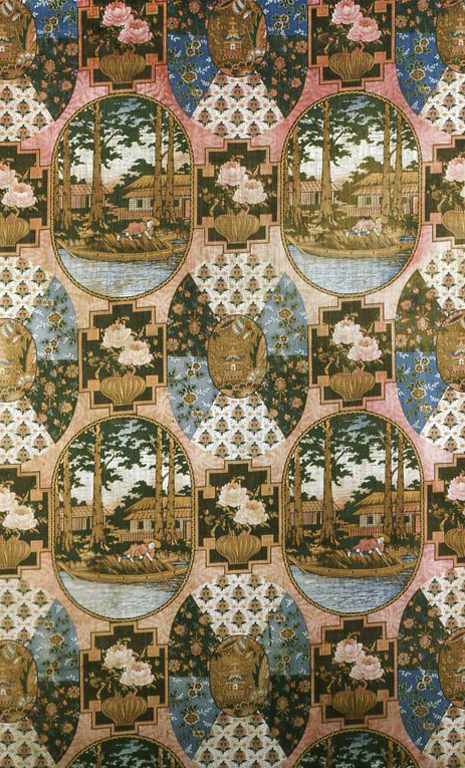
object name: Textile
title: Panel (Furnishing Fabric)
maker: United States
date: c. 1870/80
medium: Cotton, plain weave; printed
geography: United States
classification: textile; weaving - printed; furnishing textile